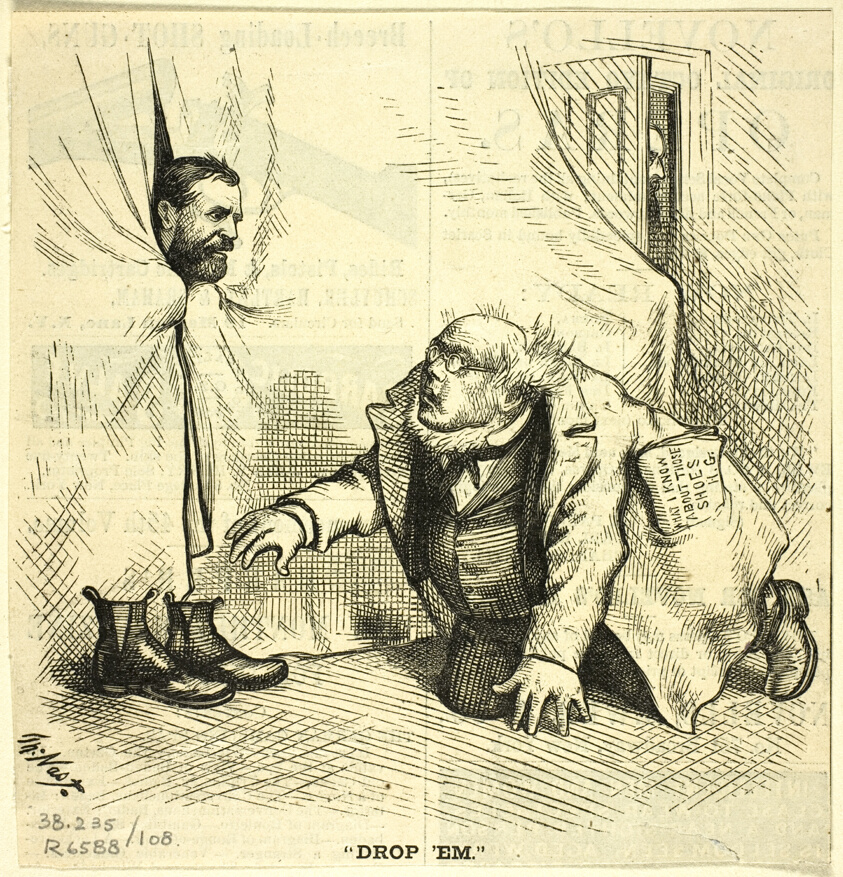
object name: Print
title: Drop 'Em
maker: Thomas Nast (American, 1840-1902)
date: 1872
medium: Lithograph on newsprint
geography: United States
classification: lithograph; print; prints and drawing